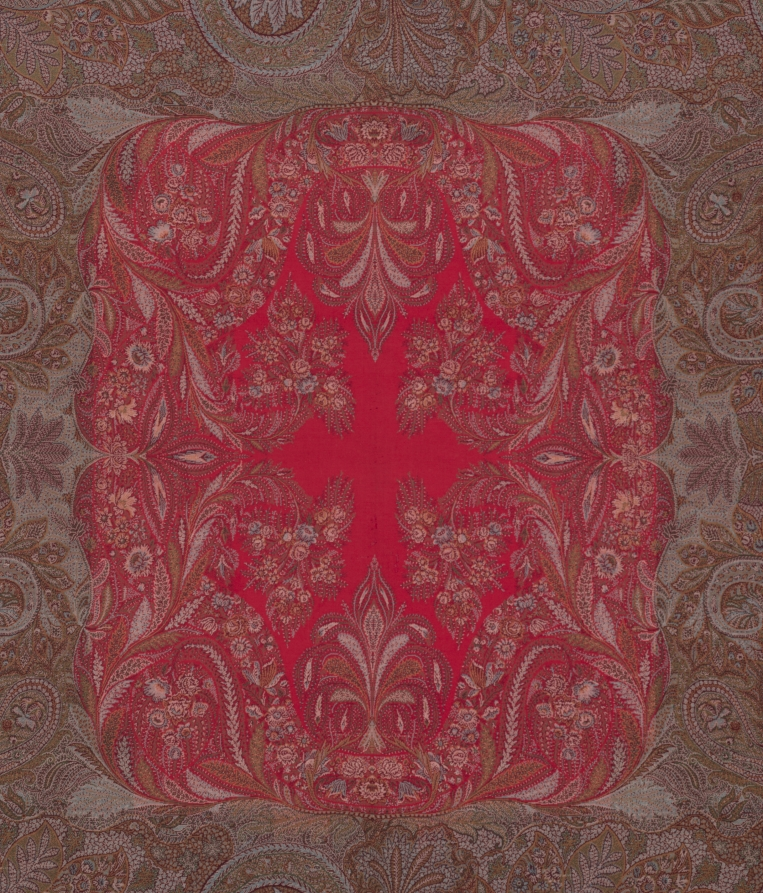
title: Long Shawl in a Vegetal Style with Coral Center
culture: Austria, England, France, or Scotland, 19th century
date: 1848–52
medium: 3/1 twill weave; wool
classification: Textile